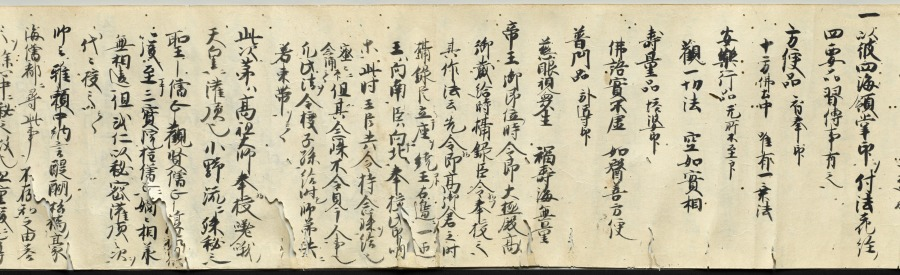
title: Scroll of Miscellaneous Notes written on a Calendar by Priest Seigen (recto)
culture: Japan, Kamakura period (1185–1333)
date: c. 1200–1231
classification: Manuscript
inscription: bears miscellaneous notes written by Priest Seigen.